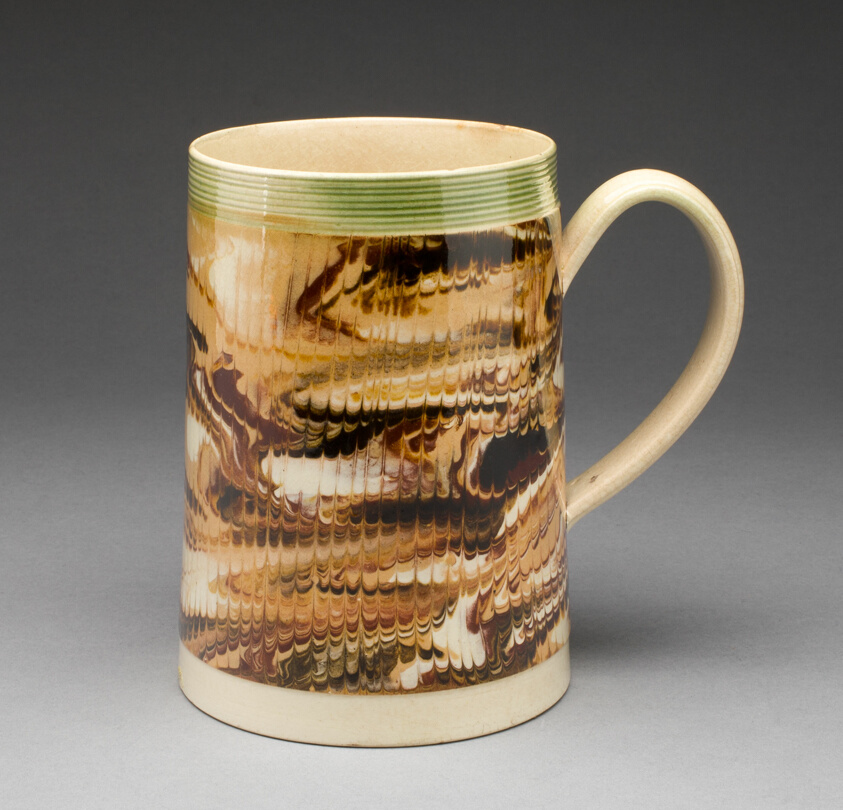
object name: Ceramics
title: Tankard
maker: England, Staffordshire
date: c. 1810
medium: Lead-glazed earthenware (marble creamware)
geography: Staffordshire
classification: drinking vessel; earthenware; european decorative arts; ceramics; creamware; lead-glazed earthenware